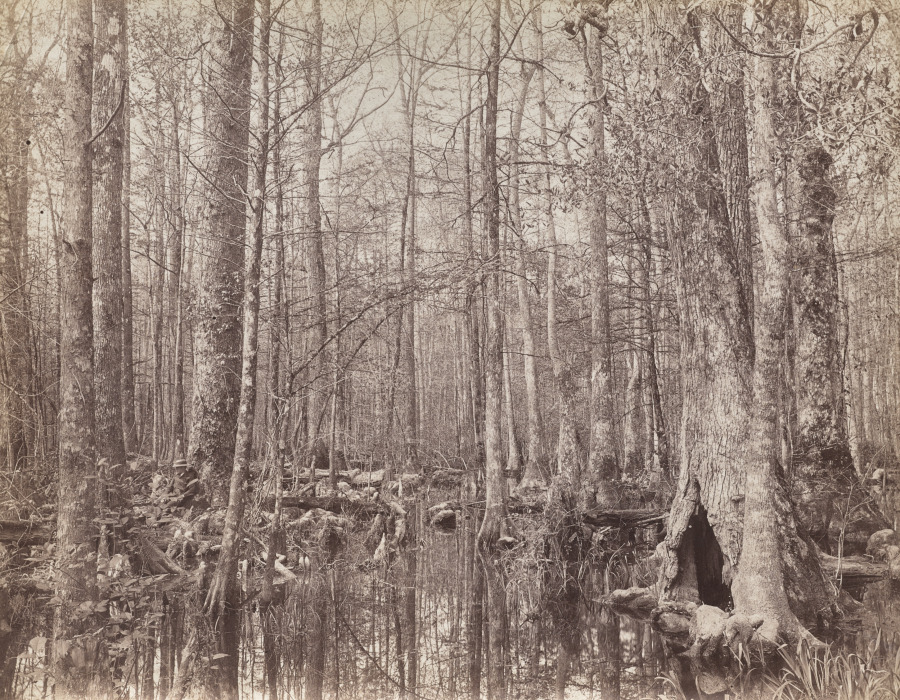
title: Great Dismal Swamp, Virginia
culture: America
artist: Israel Cook Russell (American, 1852–1906)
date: c. 1872–90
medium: albumen print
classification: Photograph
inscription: Handwritten in graphite on verso of photograph a/o mat: "C.H. Merriam, attrib.; Dismal Swamp, NC, c. 1880 (?); GE 1890.2; 172; 450"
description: Israel Cook Russell’s view of the Great Dismal Swamp, which straddles the border between Virginia and North Carolina, evokes both the locale’s abundance of timber and its sense of desolation. Russell, a celebrated geologist, took care to express the geological and biological forces that shaped landscapes but also to create images of artistic value.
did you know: From the 1700s through the Civil War, the Great Dismal Swamp’s timber was harvested by slave labor, yet the swamp also housed numerous people who had escaped slavery.